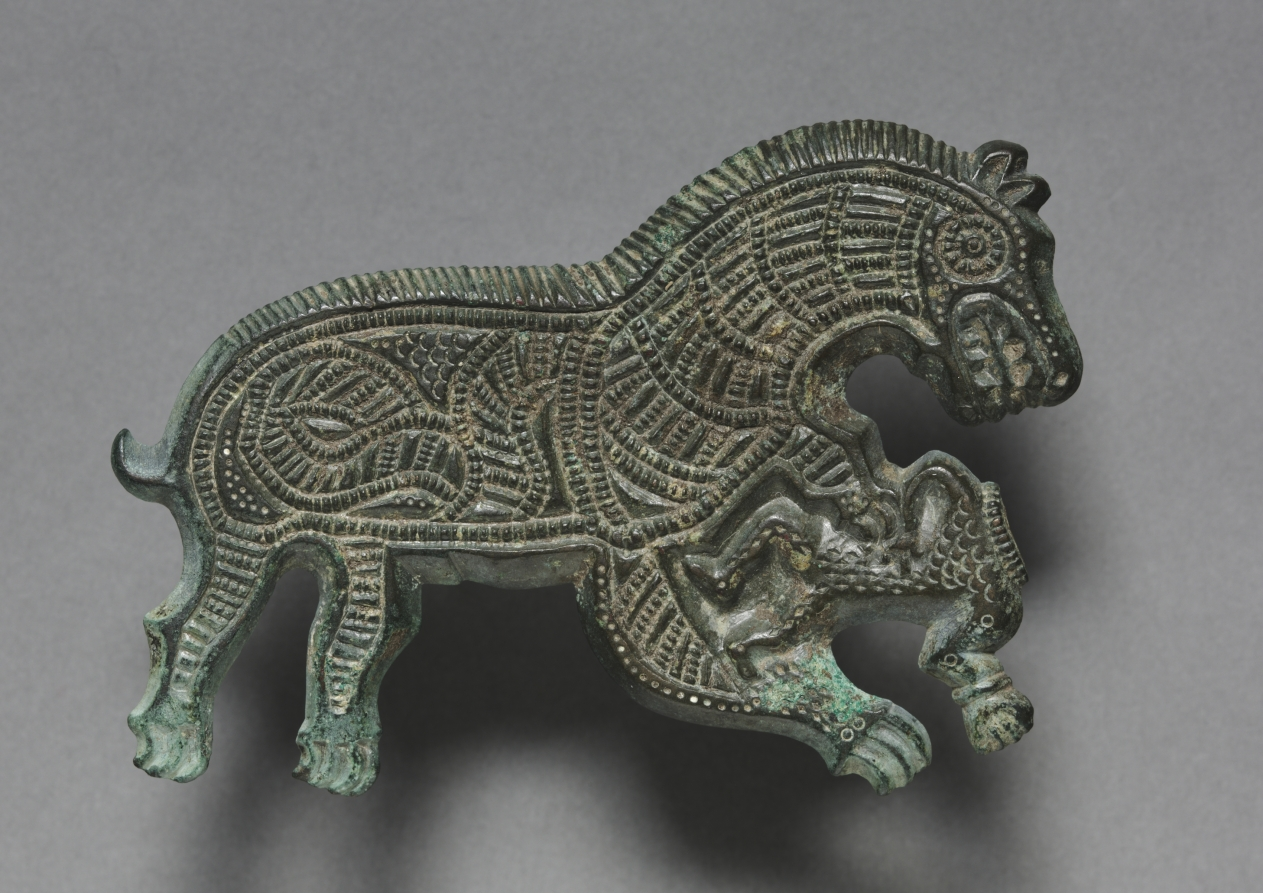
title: Wolf Attacking a Man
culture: Thrace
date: 400–300 BCE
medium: bronze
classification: Sculpture